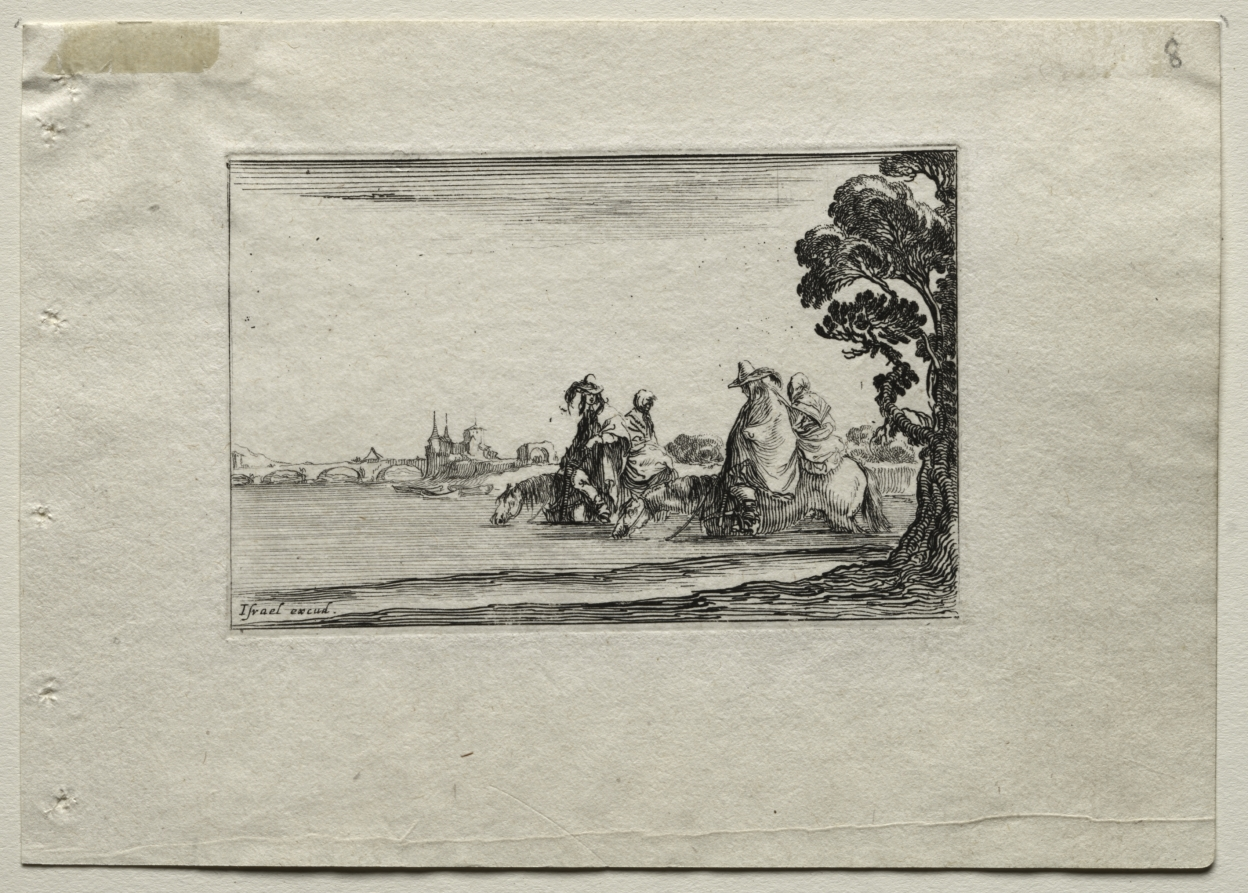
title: Caprices: Cavaliers Watering their Horses in a River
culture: Italy, 17th century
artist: Stefano Della Bella (Italian, 1610–1664)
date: c. 1642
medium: etching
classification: Print